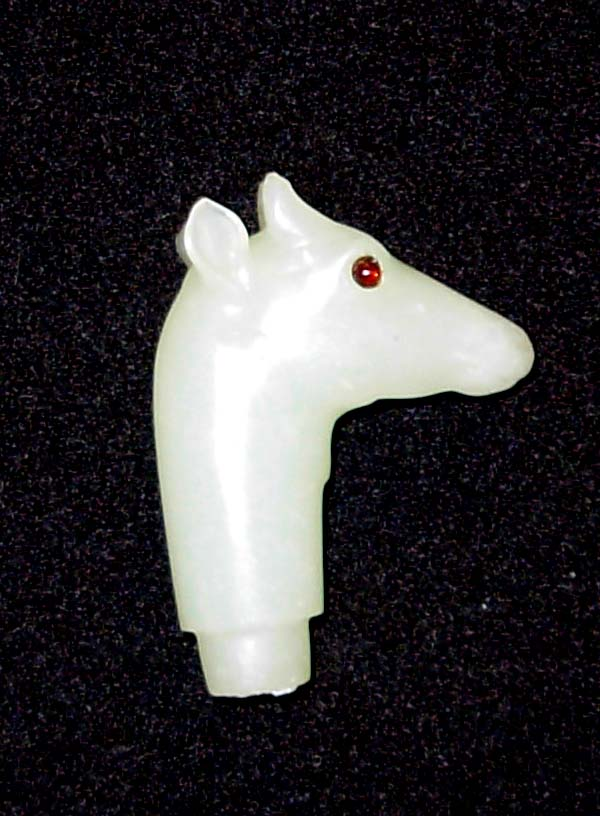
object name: Decorative Arts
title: Knife Hilt with Deer-Head Pommel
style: South Asian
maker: India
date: 18th century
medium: Jade with rubies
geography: India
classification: jade; asian art; decorative arts